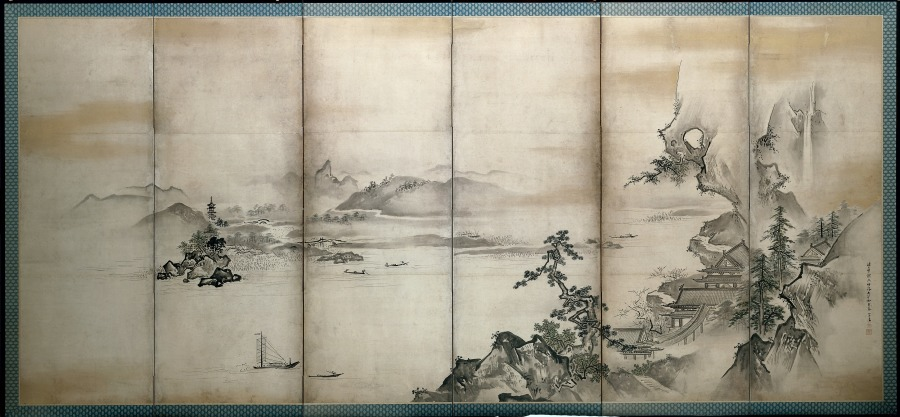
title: The Four Seasons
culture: Japan, Edo period (1615–1868)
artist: Kano Tan’yū (Japanese, 1602–1674)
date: 1668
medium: pair of six-panel folding screens, ink and slight color on paper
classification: Painting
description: Tan'yū's skills were honed early within the regimen of the Kano family's painting studio. His grandfather, Eitoku (1543–1590) was the Momoyama period's most sought-after painter, a champion of colorful, large-scale painting compositions who worked for several of the country's most powerful leaders. When the young Tan'yū was summoned to Edo in 1617 by the shogun to become a member of the new capital's official painting studio, few opportunities to work on similarly ambitious projects existed. Yet by the end of his career, Tan'yū had supervised the execution and installation of linked mural painting compositions in several of Japan's most prestigious residences and castles. As an official court painter to the first shogun, Tokugawa Ieyasu (reigned 1603–5), and then his successors, Tan'yū appears to have successfully juggled his official duties with private activities as a teacher, as the era's leading connoisseur of classic Chinese and Japanese painting, and as a practicing artist. His surviving compositions as well as thousands of sketches far surpass the oeuvre of any of his contemporaries. While studio assistants surely contributed to his oeuvre, just as later imitators consciously confused his accomplishments, a clearer image of the painter has emerged in recent years that better conforms with his contemporary acclaim as recorded in seventeenth- and eighteenth-century documents. Tan'yū can now be seen as an artist adept in virtually all traditional ink painting subject matter, which he often presented in novel interpretations. Equally important are his rare screen (byōbu) compositions executed in a pure yamato-e manner with vivid mineral pigments on a gold-foil background. This pair of byōbu presents Tan'yū's more orthodox approach to academic ink painting methods embracing Chinese themes that had been interpreted by numerous Japanese ink painters over the centuries. Thus a typical view of residences and human activities set along the shores of an impressive river (or lake) is enlivened by the Japanese proclivity for including seasonal references. Proceeding from right to left, the viewer passes sequentially from spring to the snow-laden branches of winter. Tan'yū lends considerable atmospherics to the panorama in his use of misty cloud banks, frequently set off by sharp, darkened ink lines or whole areas of ink washes of variegated tonalities. The spring and summer views are particularly notable in this regard, as is the presence of the artist's signature on both byōbu, attesting to their completion in Tan'yū's sixty-seventh year (1668)—50 years after he left Kyoto for the capital, and 30 years following his adoption of the artist name "Tan'yū" (in 1635). From 1622, when he began work on the mural paintings for Edo castle (the shogun's formal residence), through the completion of the painting cycle in 1636 for the Tokugawa family mausoleum in Nikkō to the north of Edo, Tan'yū's skills as head of an accomplished painting studio as well as a master painter found their most impressive expression in large-scale compositions. In 1638 he received the honorary Buddhist title Hōgen (Eye of the Law). It is intriguing therefore that relatively few independent byōbu paintings from the master's hand survive, particularly documented early works.